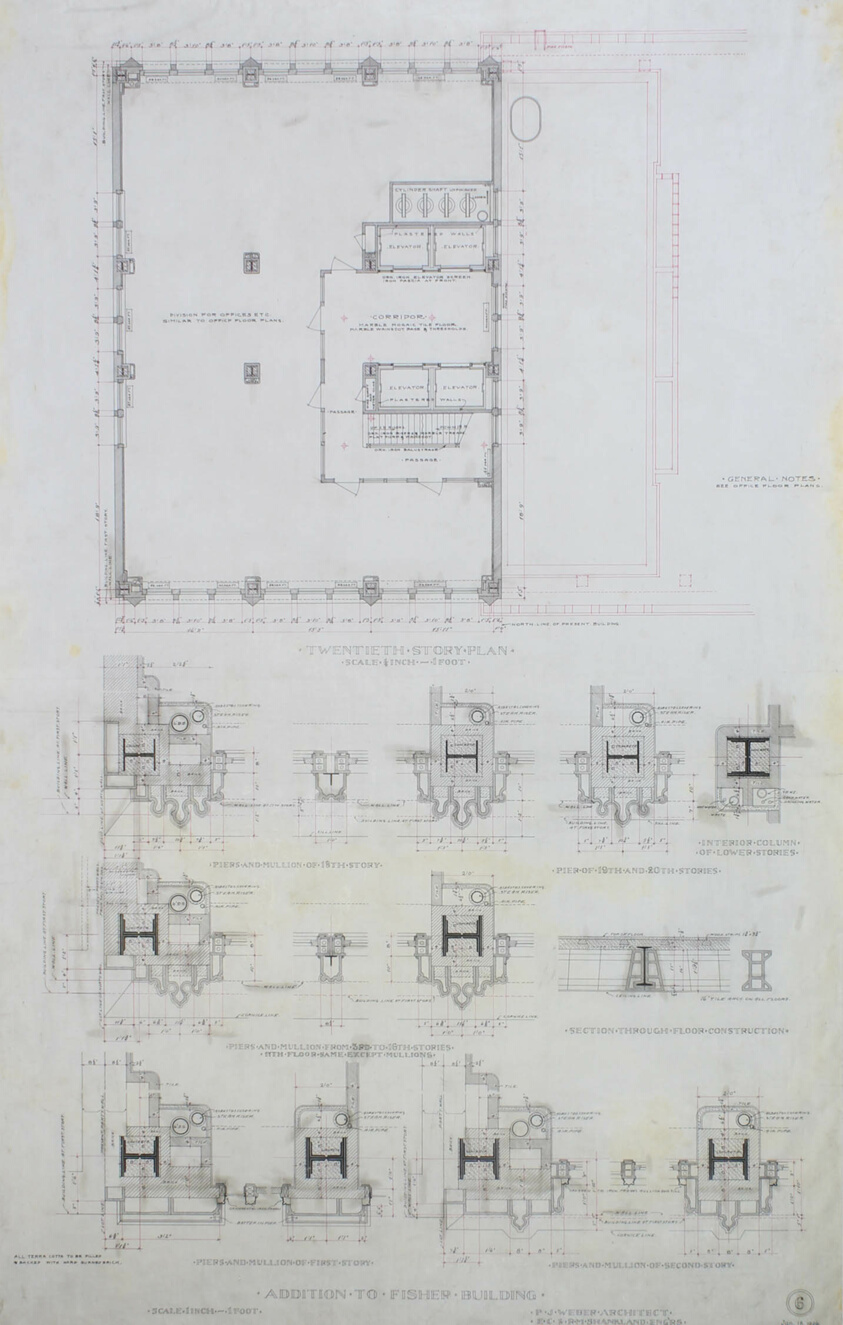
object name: Architectural Drawing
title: Fisher Building Addition, Chicago, Illinois, Detail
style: 19th century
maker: Peter Joseph Weber (American, 1863-1923); Howells & Stokes (American, Unknown); P J Weber (American, Chicago, born 19th Cen - d. 20th Cen); Lord & Hewlett (American, act. 1920s)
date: 1890 1904.; 1913–1914.; 1893.; 1901; 1917.; 1917–1918; c.1917; 1914.; 1911–1913.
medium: Black and red ink on linen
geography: Chicago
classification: architectural drawing; architecture; architectural detail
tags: buildings, architecture, Chicago, design, drawing, illinois